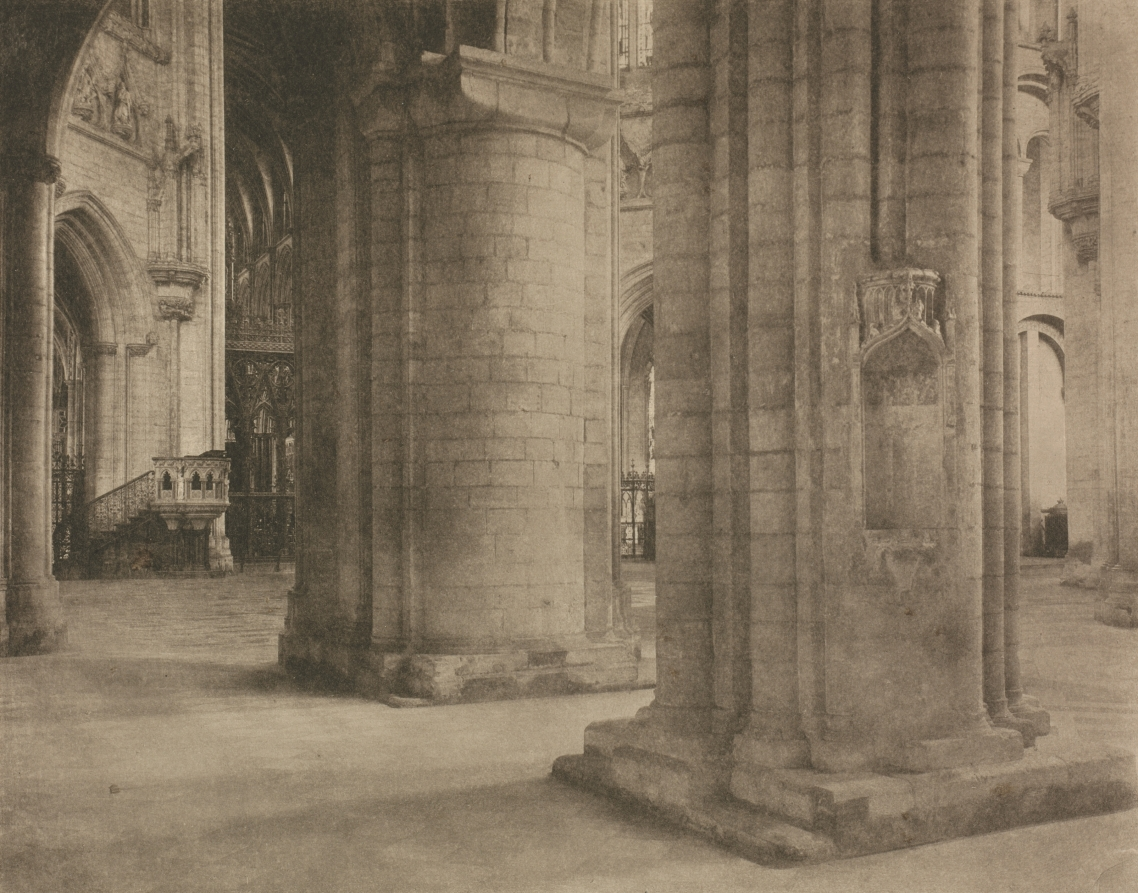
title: Camera Work: Ely Cathedral: Across Nave and Octagon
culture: England, 20th century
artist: Frederick H. Evans (British, 1853–1943)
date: 1903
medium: photogravure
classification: Bound Volume